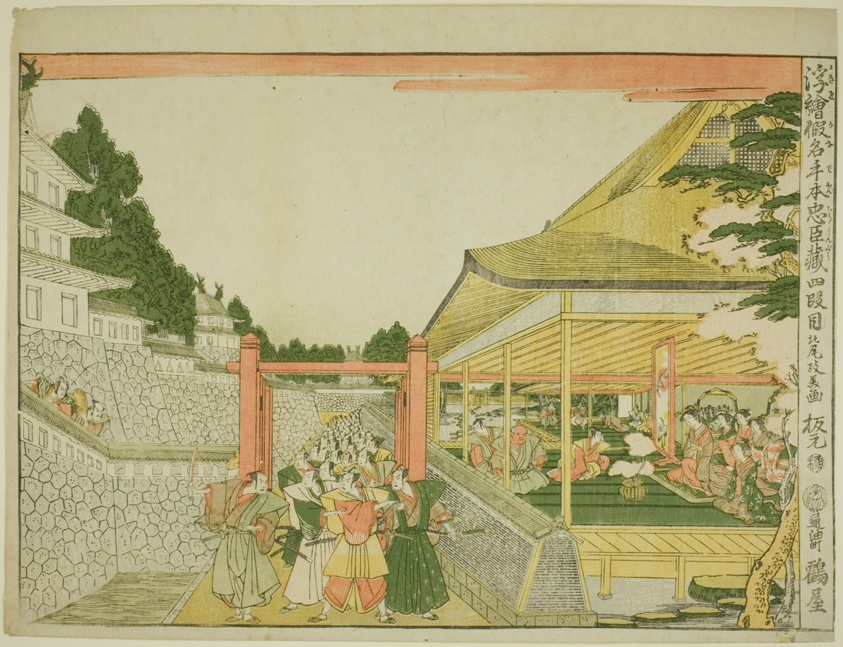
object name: Print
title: Act IV (Yondanme), from the series "Perspective Pictures of the Storehouse of Loyal Retainers (Uki-e kanadehon Chushingura)"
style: Japanese (culture or style), edo (japanese period)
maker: Kitao Masayoshi (Kuwagata Keisai) (Japanese, 1764–1824)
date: c. 1791/94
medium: Color woodblock print; horizontal o-oban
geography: Japan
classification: woodblock; print